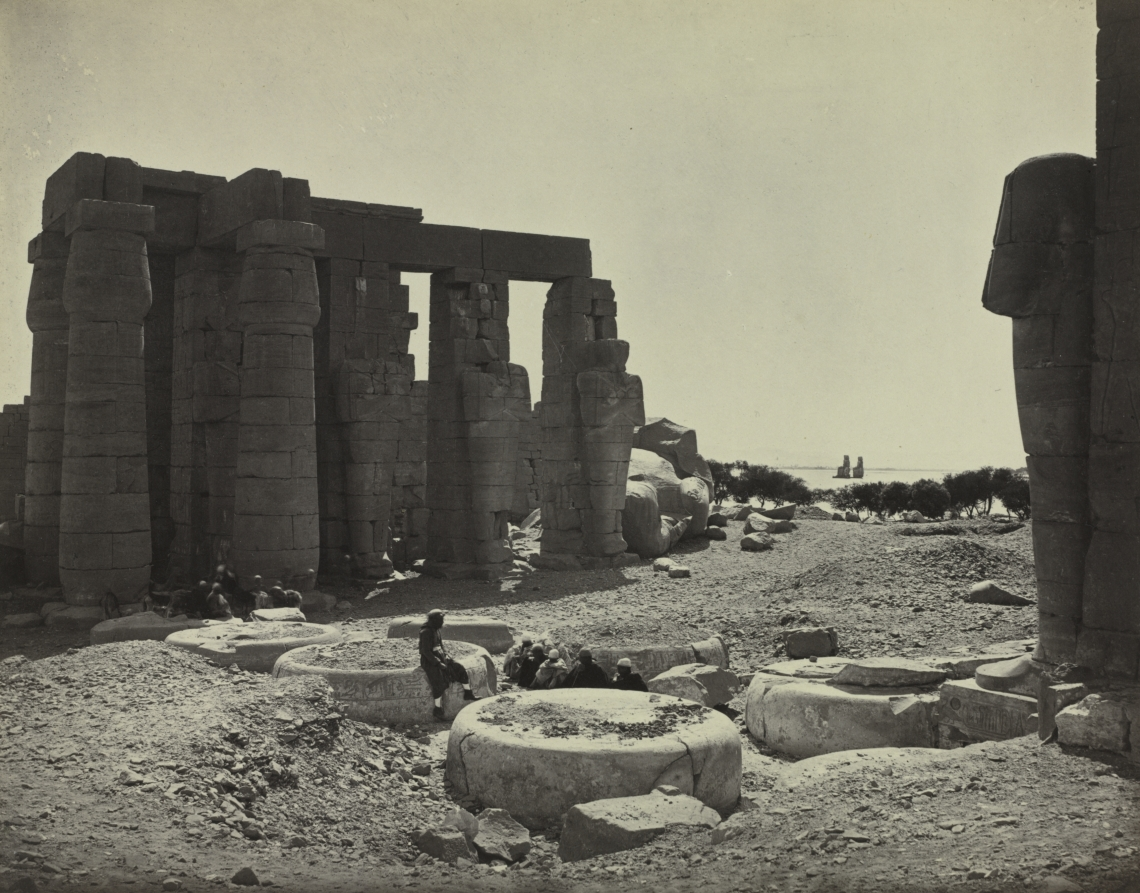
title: The Ramesseum, Thebes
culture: France, 19th century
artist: Adolphe Braun (French, 1812–1877)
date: 1869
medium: albumen print from wet collodion negative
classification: Photograph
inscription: Written in black marker on verso: "P-33-83"; in pencil: "WO [rest torn off] / 3.00"